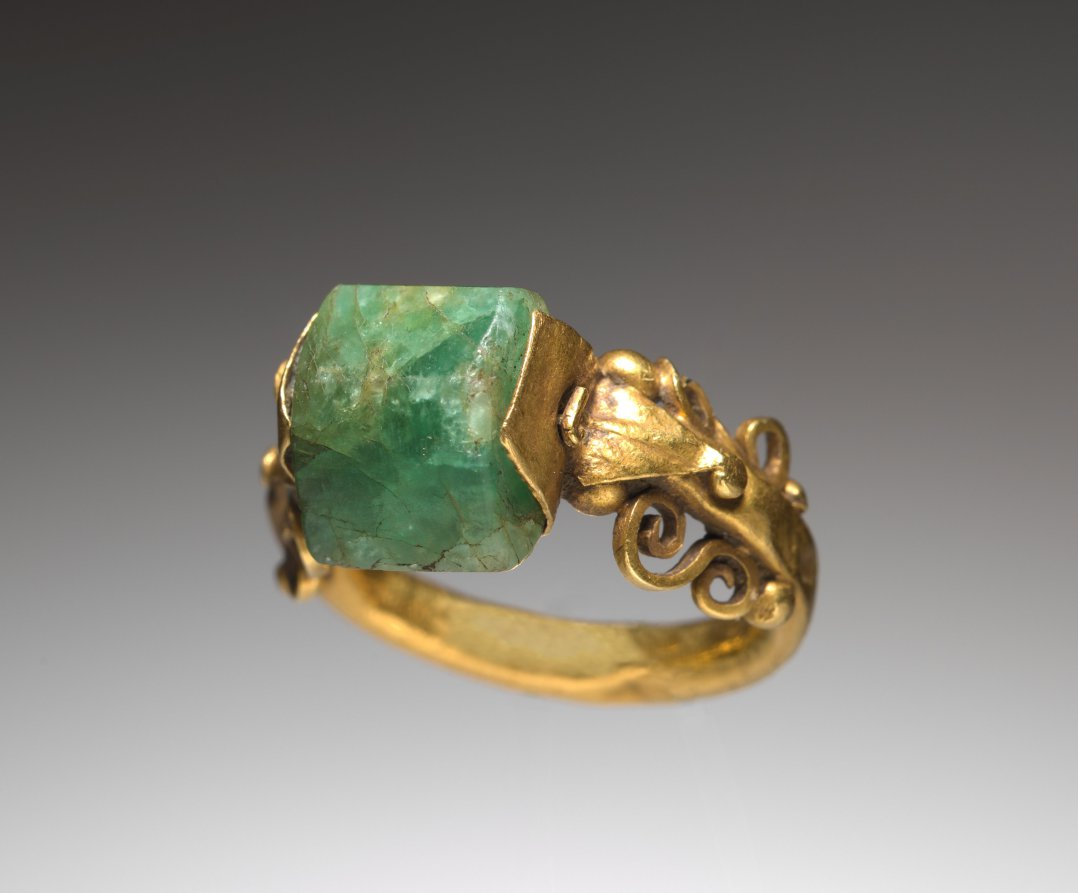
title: Ring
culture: Byzantium (style of), probably 19th-20th century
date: probably 1800s-1900s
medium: gold and jade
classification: Jewelry